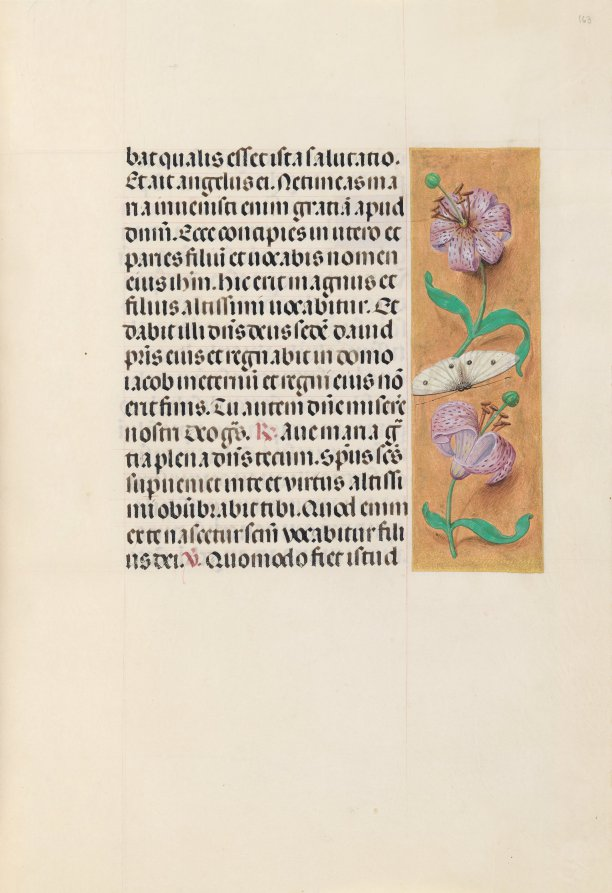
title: Hours of Queen Isabella the Catholic, Queen of Spain: Fol. 163r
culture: Flanders, Ghent and Bruges, late 15th century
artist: Master of the First Prayerbook of Maximillian (Flemish, c. 1444–1519)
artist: and Associates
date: c. 1500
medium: ink, tempera, and gold on vellum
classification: Bound Volume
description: This manuscript was illuminated by a circle of at least five highly organized manuscript painters active in the Flemish cities of Ghent and Bruges. The principal illuminator was Alexander Bening, who painted the majority of the book's miniatures. Manuscripts produced by this circle of artists are renowned for the decoration of their borders, which typically feature a rich variety of realistically-painted flowers, birds, and butterflies. This prayer book, called a book of hours, was intended not for a cleric, but for the private devotions of a lay person-in this case, Isabella the Catholic, Queen of Spain (1451-1504). Isabella's coat of arms embellishes the book's frontispiece. It is unlikely that the book was commissioned by the Queen herself; rather, she probably received it as a diplomatic gift from someone courting her patronage, perhaps Cardinal Francisco Jimenez de Cisneros. A Franciscan friar, Jimenez was dependent upon Isabella for his advancement, first to the post of Queen's confessor in 1492, and then to Archbishop of Toledo in 1495.